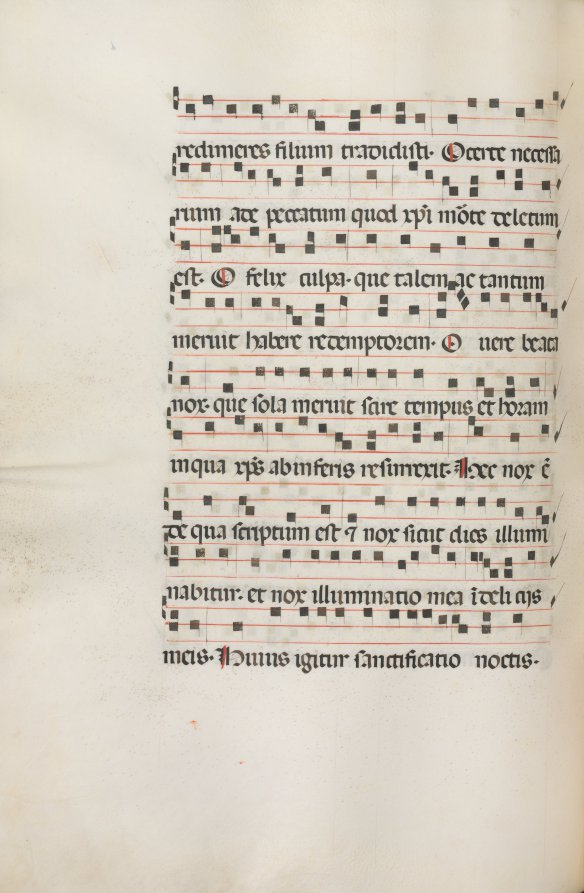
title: Missale: Fol. 155v: Music for "Exultet"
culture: Italy, Perugia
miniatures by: Bartolommeo Caporali (Italian, c. 1420–1503)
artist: assisted by Giapeco Caporali (Italian, d. 1478)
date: 1469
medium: ink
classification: Bound Volume